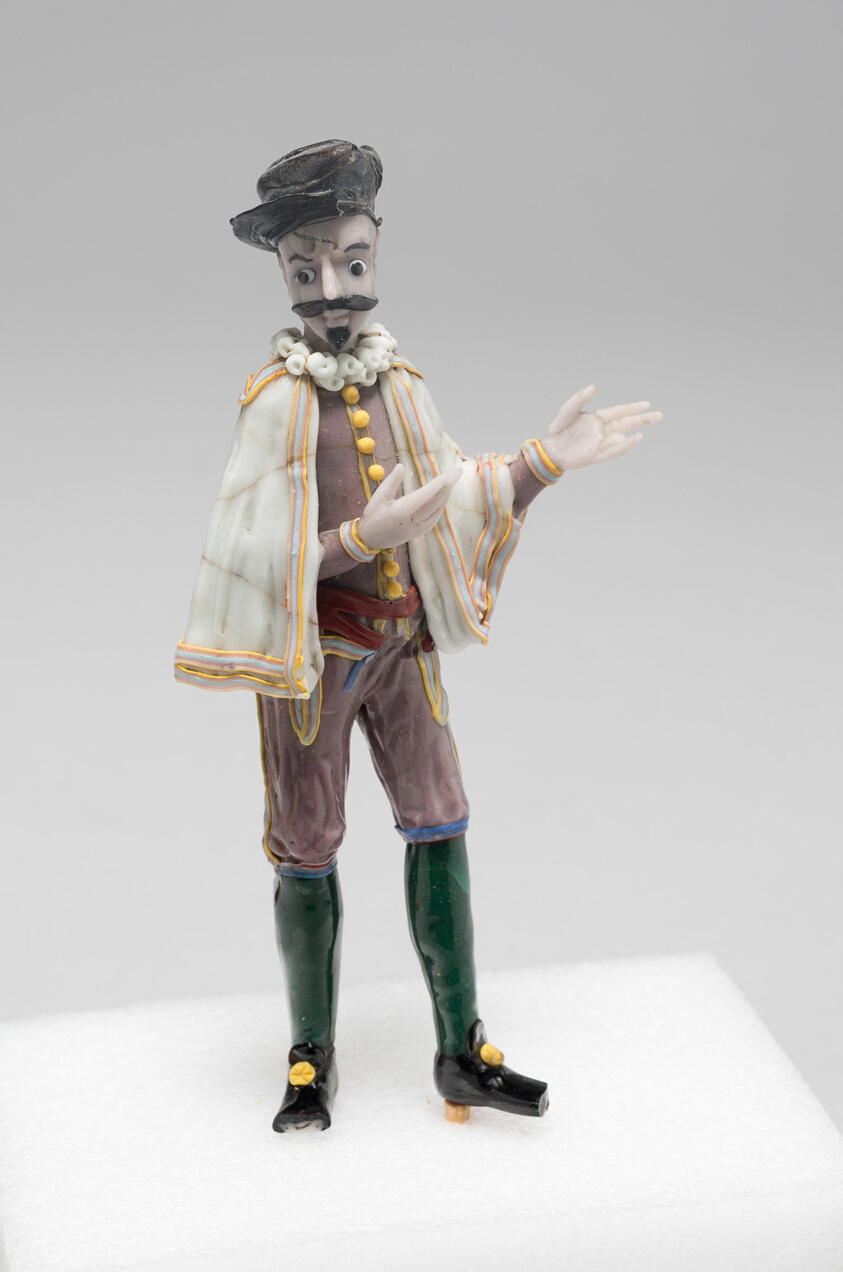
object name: Glass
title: Actor with Moustache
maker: Nevers, France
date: Late 17th to early 18th century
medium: Glass; lampwork (verre de Nevers), metal armature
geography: France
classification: decorative object/ornament; lampwork; glass; european decorative arts